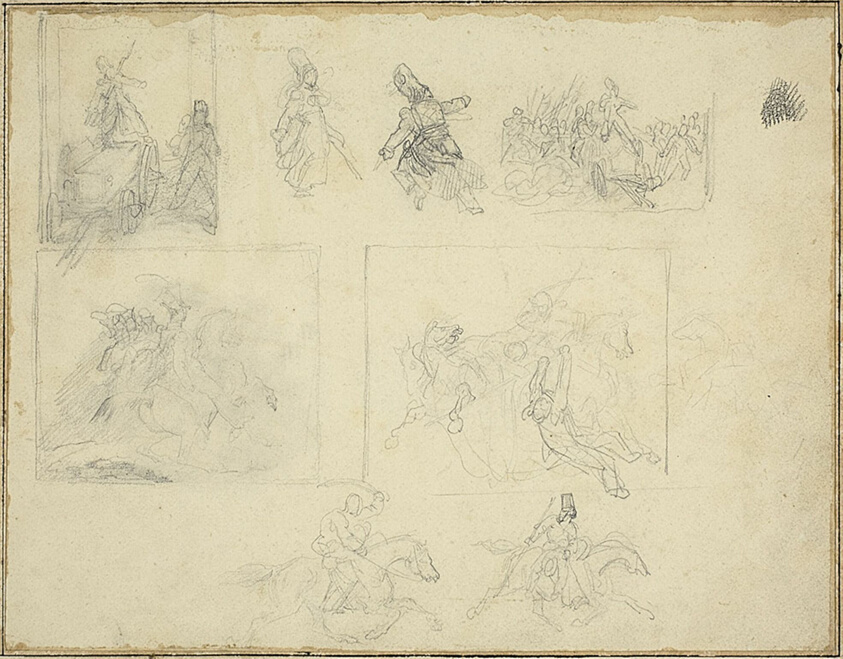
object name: Drawing and Watercolor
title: Sketches for Military Compositions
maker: Jean Louis André Théodore Géricault (French, 1791-1824)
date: c. 1818–1819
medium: Graphite with stumping on cream wove paper, perimeter mounted on cream wove paper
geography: France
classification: graphite; drawings (visual works); prints and drawing